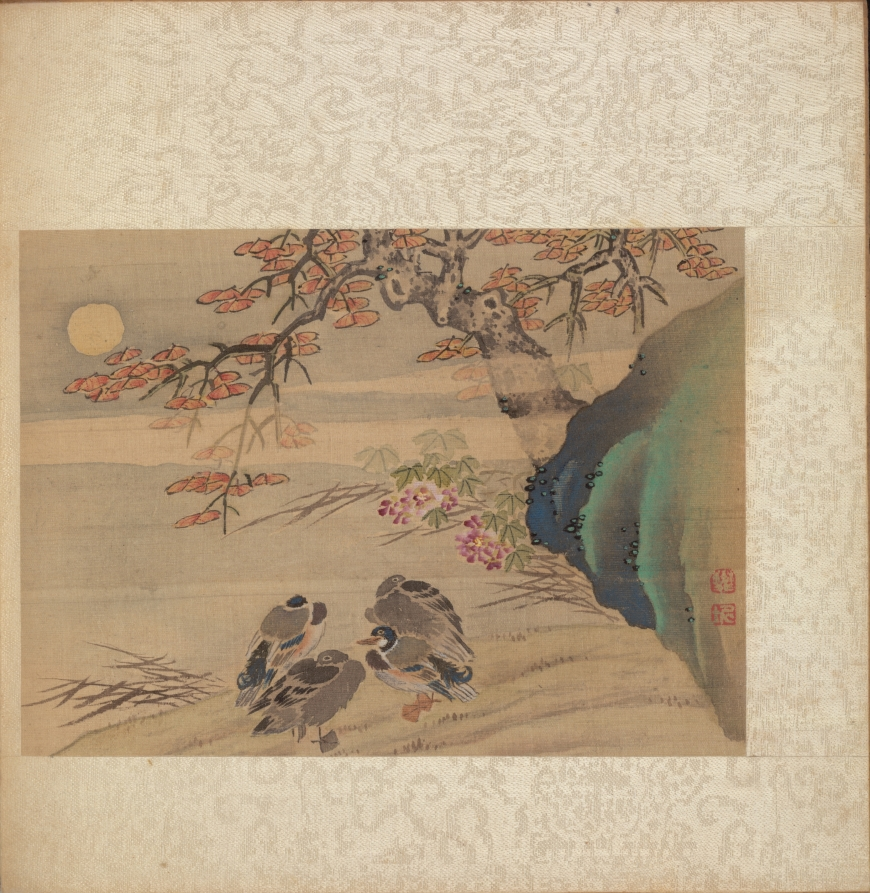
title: Album of Miscellaneous Subjects, Leaf 8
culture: China, Qing dynasty (1644-1911)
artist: Fan Qi (Chinese, 1616–after 1694)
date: early 1650s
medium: album leaf; ink and color on silk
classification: Painting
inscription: Artist seal: Fan Qi 樊圻. Poem by Li Bing 李炳 (17th century): Maple leaves drift in the wind, the autumn gusts bracing,/ Hibiscus flowers steeped with water, the evening breeze light./ The moonlight's slanting beams shine upon dreaming lovers./ No wonder that pair of fowl should dream of the absent partners.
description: Leaf 8 Li Bing's colophon reads: Maple leaves drift in the wind, the autumn gusts bracing, Hibiscus flowers steeped with water, the evening breeze light. The moonlight's slanting beams shine upon dreaming lovers. No wonder that pair of fowl should dream of their absent partners.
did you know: The rock changes from ochre to green deepening into azurite blue accented with delicate dots of malachite green.